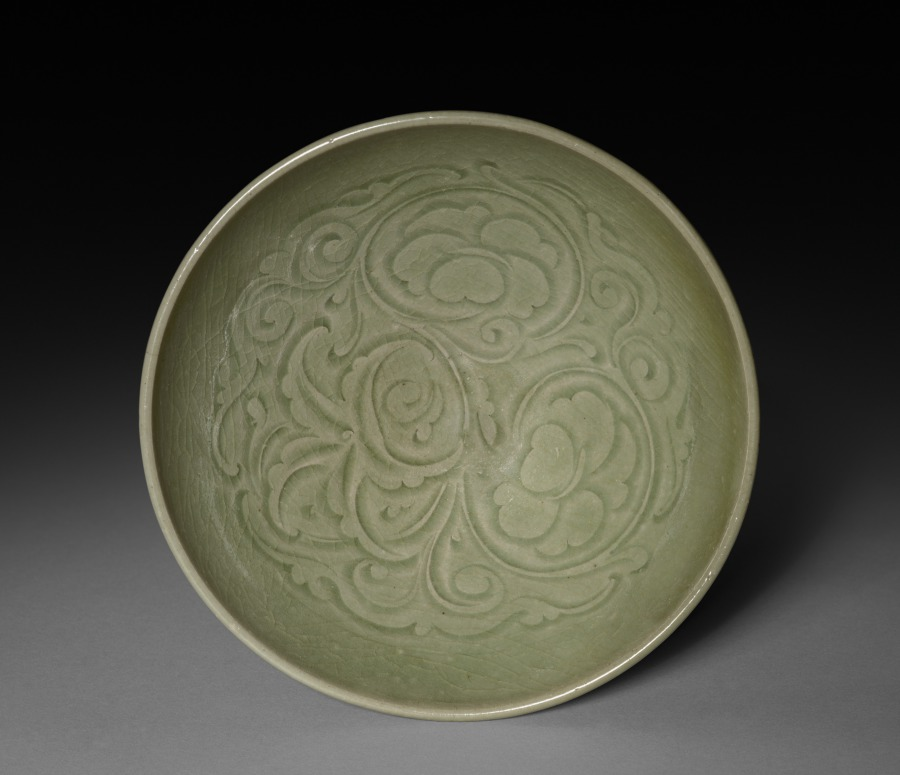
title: Bowl with carved floral decoration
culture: China, probably from the Yaozhou kilns, Shaanxi Province, Northern Song dynasty (960-1127)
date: 1100s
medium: Glazed porcelain, Northern Celadon ware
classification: Ceramic